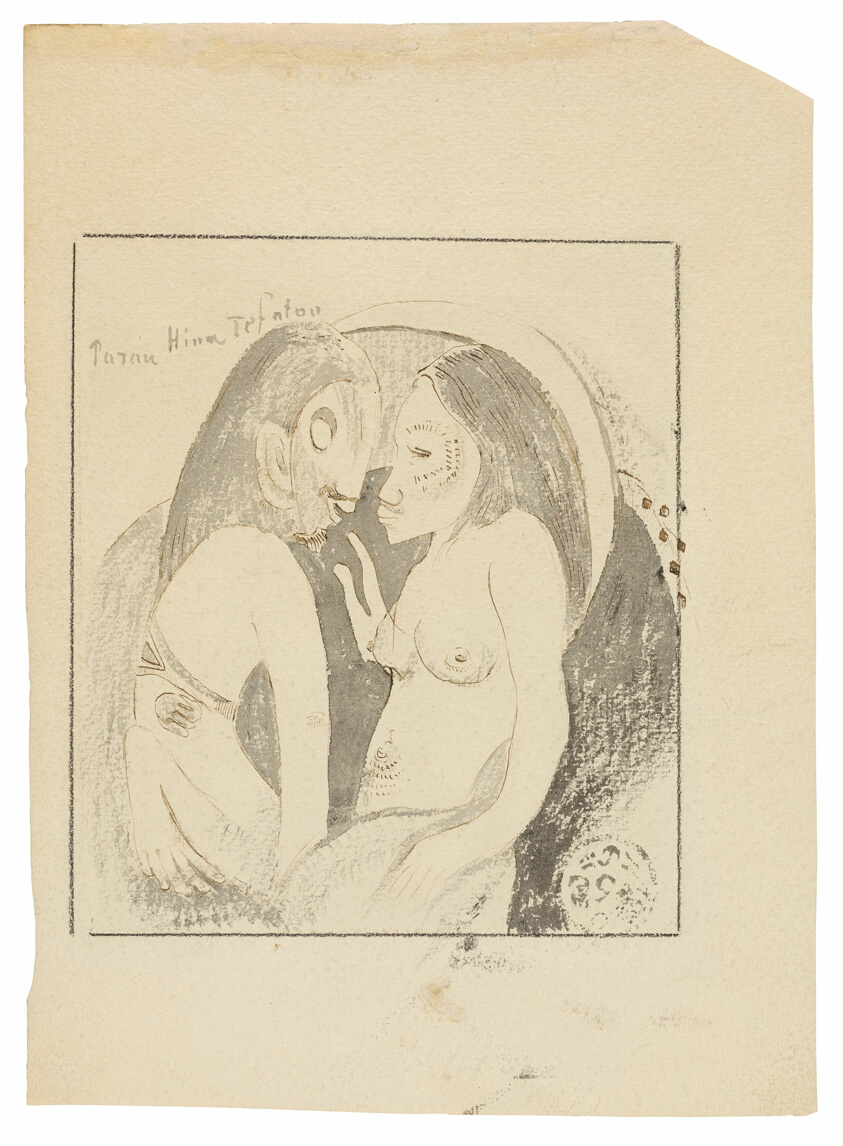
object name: Drawing and Watercolor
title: Parau Hina Tefatou (Words between Goddess of the Moon and God of the Earth)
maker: Paul Gauguin (French, 1848-1903)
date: 1893/94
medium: Brush and gray wash and pen and brown ink (originally purple, est.), with black fabricated chalk, on heavily textured ivory wove paper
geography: France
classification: pen and ink drawings; drawings (visual works); prints and drawing